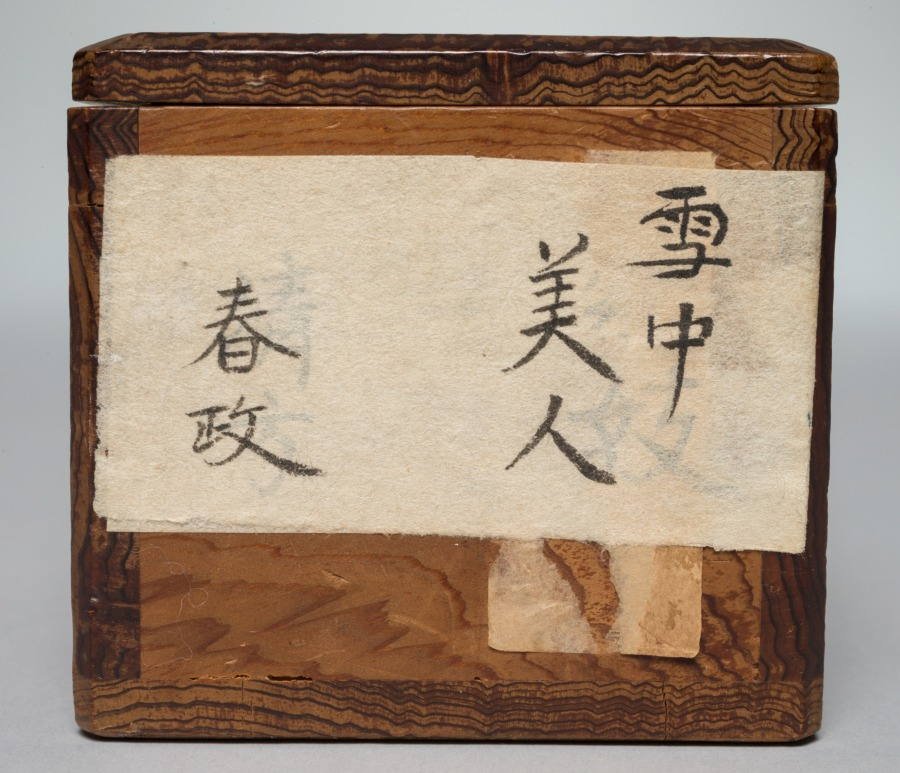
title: Lady with a Parasol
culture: Japan, Edo period (1615–1868)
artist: Koikawa Harumasa (Japanese)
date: early 1800s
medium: hanging scroll; ink, color, gold, and silver pigments on paper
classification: Painting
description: This painting depicts a young woman braving the elements as she hurries home from the local bathhouse. The action depicted accentuates her slender neck and bare legs. In later Japanese art, images of beautiful women in bare feet and a towel between their teeth have sensual overtones.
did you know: Spatters of white paint represent falling snow.